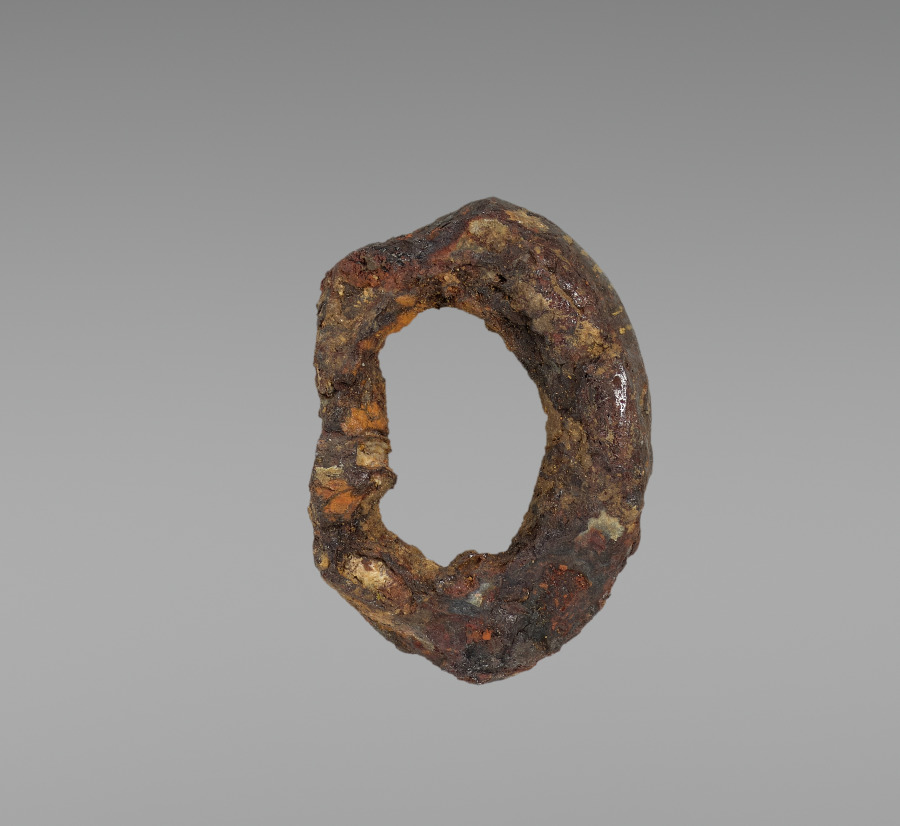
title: Buckle (loop)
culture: Merovingian, Burgundian, Migration period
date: 600s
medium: iron with silver overlay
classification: Jewelry